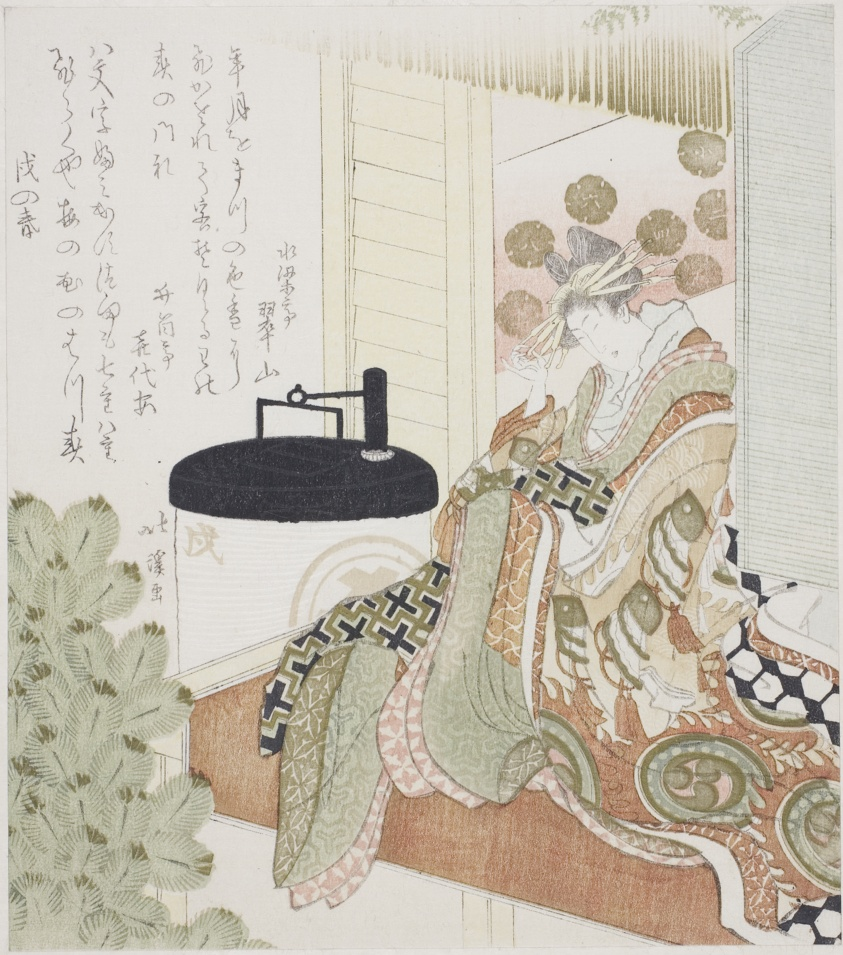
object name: Print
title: Courtesan sitting on a veranda next to a lantern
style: Japanese (culture or style)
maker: Totoya Hokkei (Japanese, 1780-1850)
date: 1814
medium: Color woodblock print; shikishiban, surimono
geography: Japan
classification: woodblock print; print; asian art